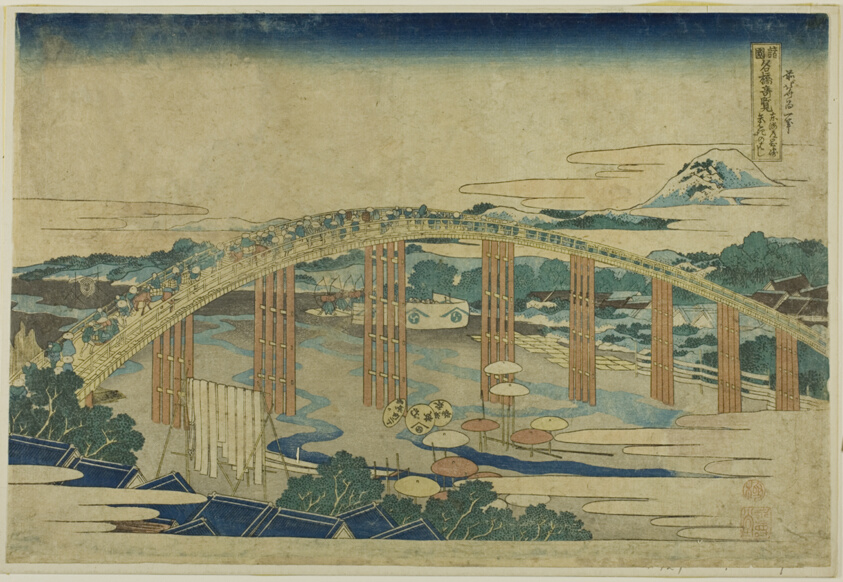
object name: Print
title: Yahagi Bridge at Okazaki on the Tokaido (Tokaido Okazaki Yahagi no hashi), from the series “Unusual Views of Famous Bridges in Various Provinces (Shokoku meikyo kiran)”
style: Japanese (culture or style)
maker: Katsushika Hokusai 葛飾 北斎; Japanese, 1760–1849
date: c. 1833/34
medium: Color woodblock print; oban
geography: Japan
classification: woodblock print; print